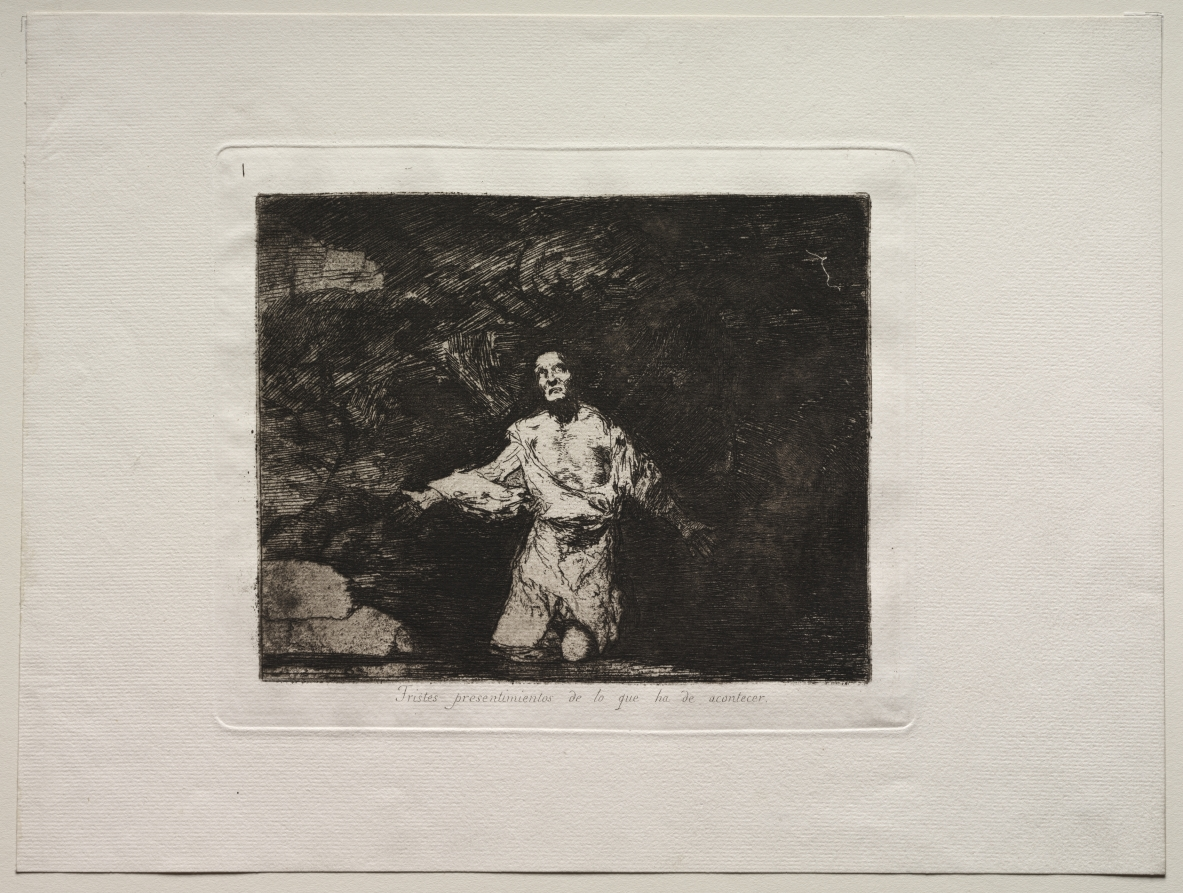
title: The Horrors of War: Title Page - Sad Forebodings of What is Going to Happen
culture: Spain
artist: Francisco de Goya (Spanish, 1746–1828)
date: c. 1810–20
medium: etching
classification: Print